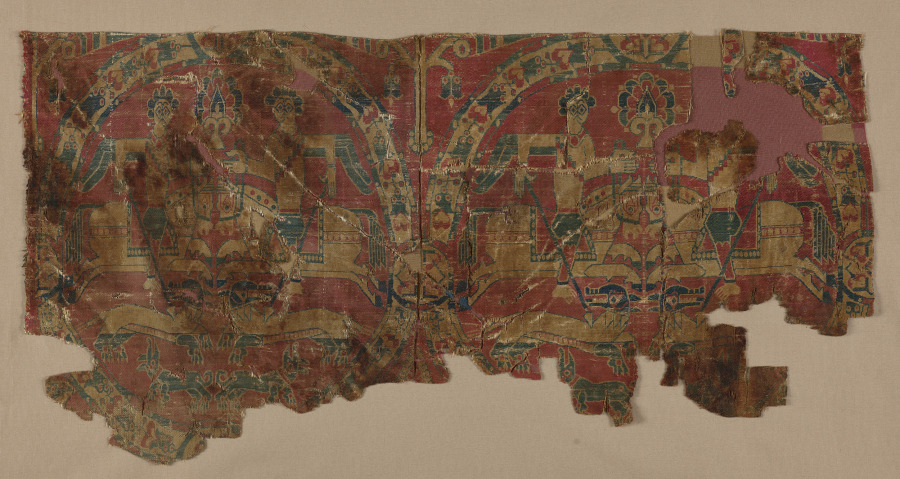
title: Roundels with Hunters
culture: Eastern Iran or Central Asia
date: 800s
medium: Silk: samite weave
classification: Textile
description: This textile consists of two fragments mounted together. They are woven with floral roundels that enclose horsemen hunting lions. The theme of riders hunting with lances, the floral frames of the roundels, and the costumes of the hunters were all inspired by silks from the Byzantine world. The stiff, abstracted style, however, is characteristic of Sogdian silks, woven in Sogdiana in Central Asia and often traded to distant markets. These fragments were preserved in a grave in Egypt where they were found sewn as ornaments onto a tunic.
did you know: The two roundels have different diameters, even though the number of warps per repeat is the same.